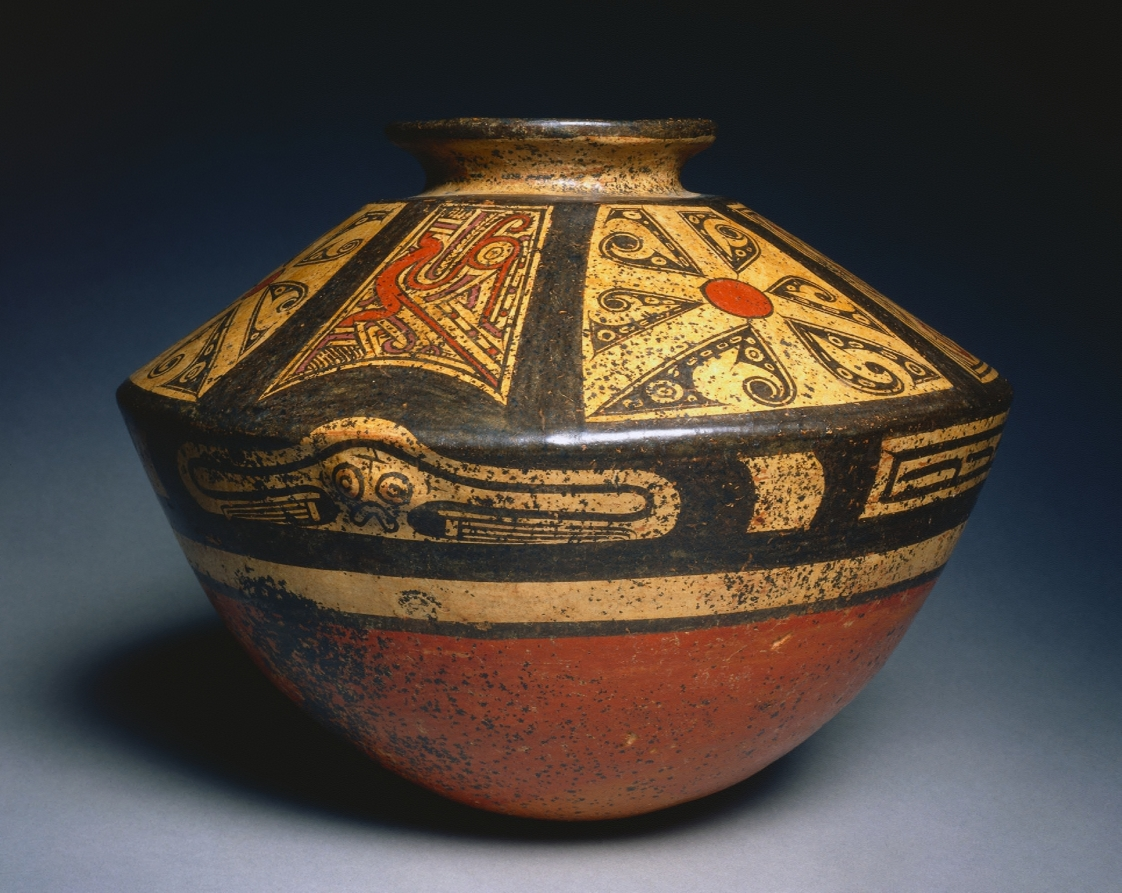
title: Vessel: Turtle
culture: Panama, Parita style, 11th-14th century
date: 1000–1300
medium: ceramic, slip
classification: Ceramic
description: Many Panamanian ceramics are among the most handsome and deftly designed in the Americas. Note how cleverly the artist used the vessel shape to imitate a turtle's carapace, its head peering out from its shell, its feet painted on the back (no. 10). And the stingray floats atop its pedestal, as though gliding through water (no. 9). Lamentably, little is known about the meaning of these witty ceramics.